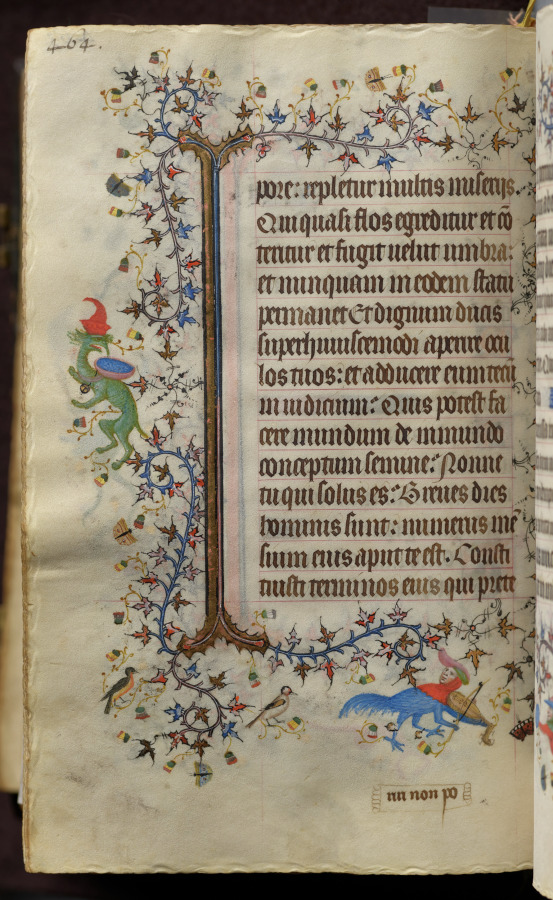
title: Hours of Charles the Noble, King of Navarre (1361-1425): fol. 226v, Text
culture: France, Paris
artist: Master of the Brussels Initials and Associates (French)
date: c. 1405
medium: ink, tempera, and gold on vellum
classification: Bound Volume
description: This precious volume was obviously highly prized by its owner, the French-born King of Navarre, who had his coat of arms painted on no less than twenty folios. Rather than directly commissioning this manuscript from a specific workshop, it seems that Charles the Noble acquired his book of hours -- perhaps ready-made for the luxury market -- while on a trip to Paris in 1404-05. A collaborative effort, six painting styles are evidenced within the pages of this codex, those of two Italians, two Frenchmen, and two Netherlanders. The painter who was responsible for the planning and decoration of the book, and who produced seventeen of the large miniatures, was a Bolognese artist known as the Master of the Brussels Initials. His principal assistant, responsible for most of the borders, was a Florentine who signed his name "Zecho" da Firenze on folio 208 verso.